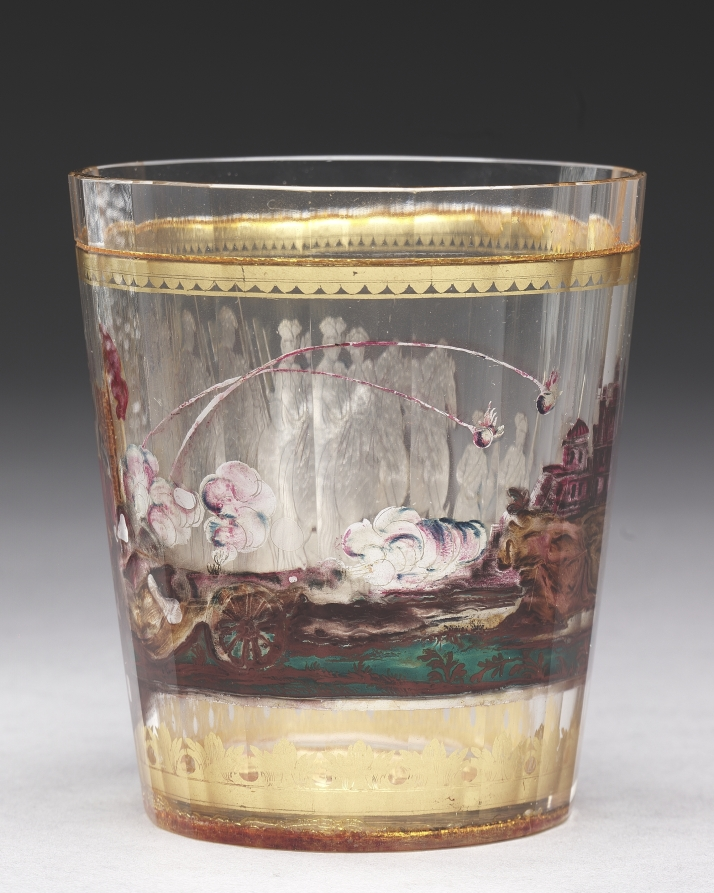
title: Tumbler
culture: Bohemia, 18th century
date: c. 1730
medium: zwischengoldglas (glass)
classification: Glass